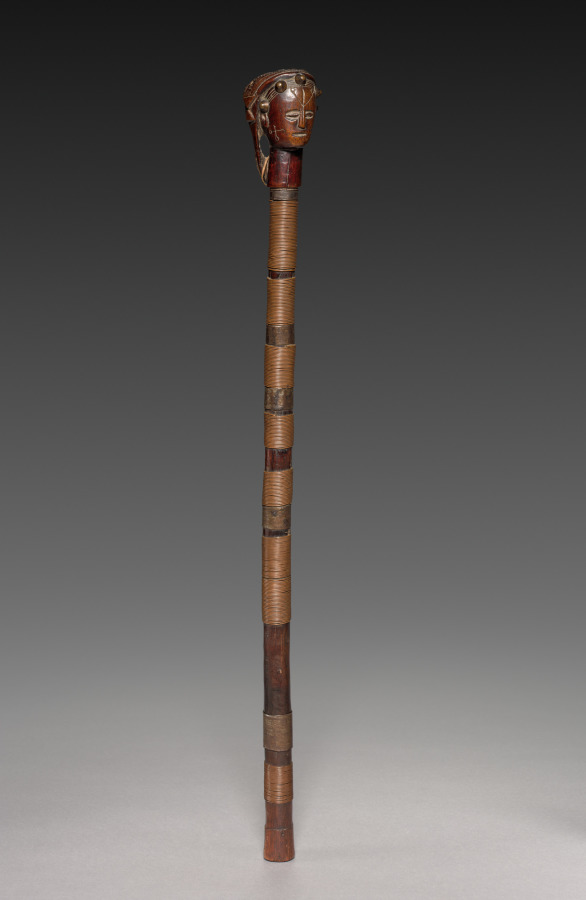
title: Scepter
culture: Africa, Central Africa, Angola, Ovimbundu-style maker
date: late 1800s or early 1900s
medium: Wood, copper alloy, upholstery studs, iron alloy, and cotton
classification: Implements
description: Staffs and scepters as well as tobacco pipes and mortars are among the most important sculptural creations to stem from the Ovimbundu peoples, a Central African culture. All of these object types have associations with ideas of class, status, and power. This scepter has a handle wrapped in thin copper wire that forms wide bands of alternating metal and wooden passages. Its finial is a human head whose carved headdress or hairstyle is ornamented with round-headed metal tacks.